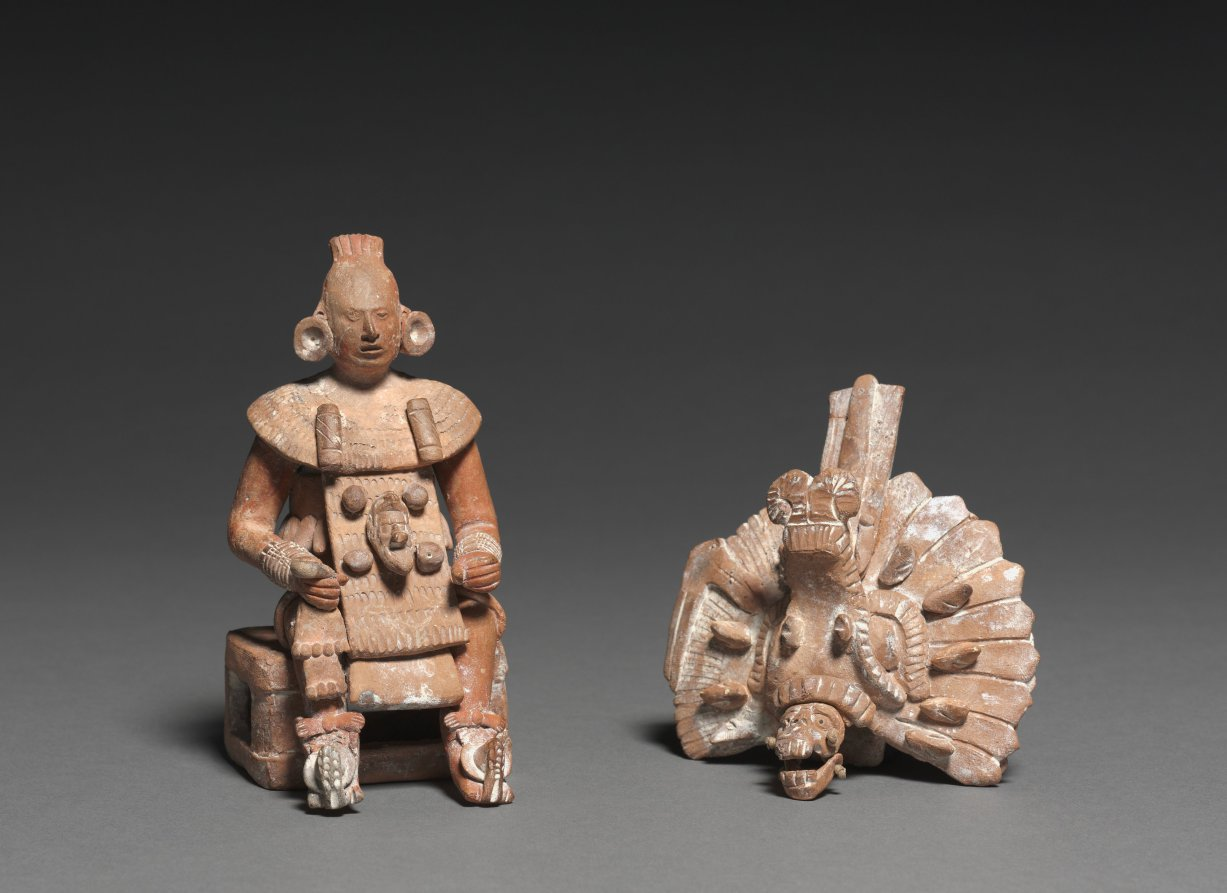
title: Seated Lord with Removable Headdress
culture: Mesoamerica, Maya, probably Jaina Island, Late Classical period, 7th-9th century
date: 600–800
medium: ceramic and slip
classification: Ceramic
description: The major Maya grave offerings on Jaina Island were ceramic figurines that depict deities and humans in a variety of roles. The standing figure represents a warrior who once probably held weapons and wears either quilted cotton armor or the feathered uniform of a military order. The seated figure also represents a male, perhaps another warrior, who wears a huge zoomorphic headdress. A skeletal face with articulated jaw descends from the headdress to fit as a mask over the figure’s face.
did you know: It is estimated that some 20,000 people were buried on the tiny island of Jaina over a 500-year period.